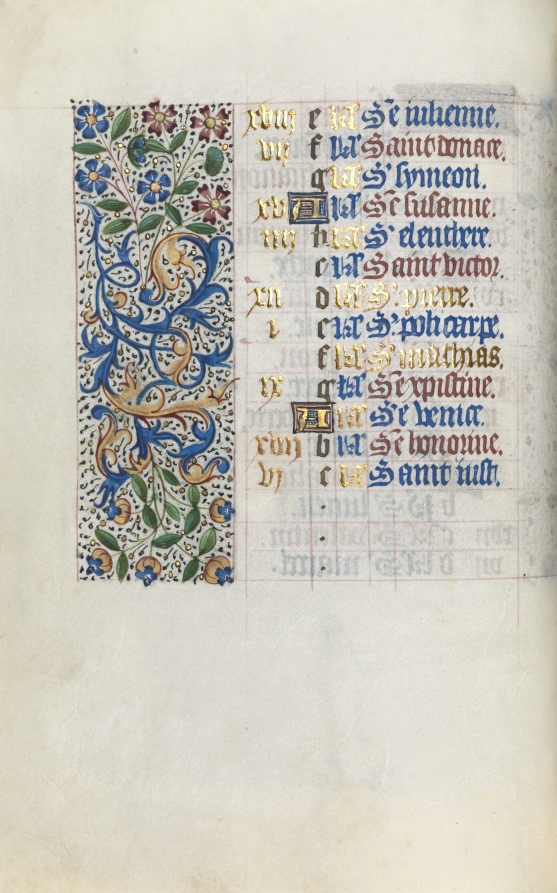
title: Book of Hours (Use of Rouen): fol. 2v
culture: France, Rouen, 15th century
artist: Master of the Geneva Latini (French, active Rouen, 1460–80)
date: c. 1470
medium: ink, tempera, and gold on vellum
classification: Bound Volume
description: In the late 1400s and early 1500s Rouen was an established and important center of book production. The city’s cathedral had a wealthy chapter that spent large sums of money to commission books and to maintain its extensive library. The stationers and booksellers would have likely been concentrated in or near the cathedral precinct. This artist, named after a manuscript now in Geneva, was Rouen’s principal illuminator during the second half of the 1400s.